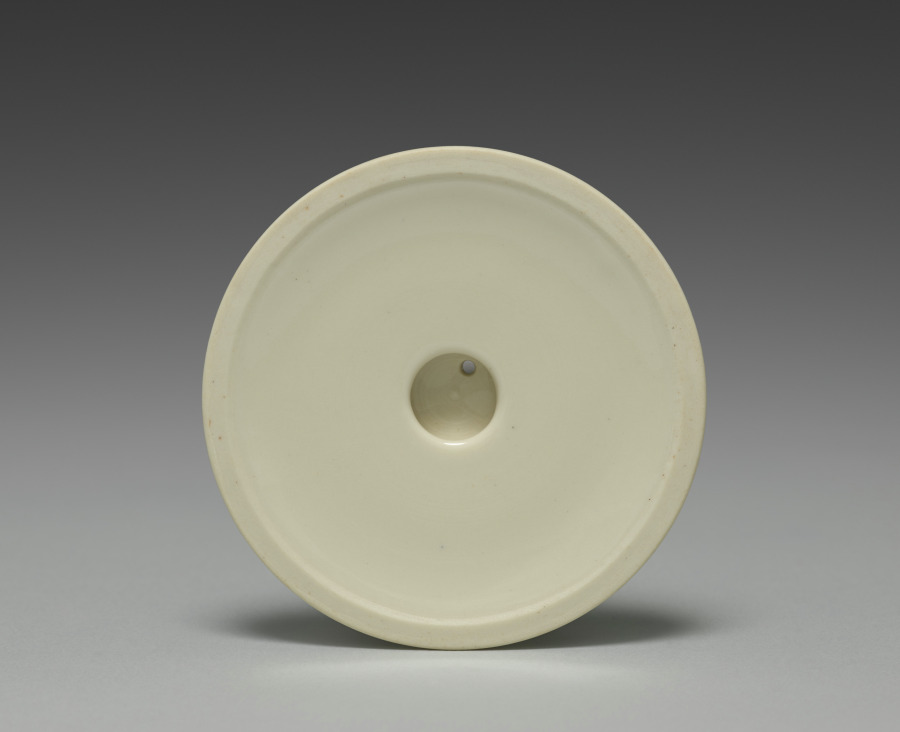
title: Lid for a Hand-held Teapot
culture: Japan, Meiji period (1868–1912)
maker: Seifū Yohei III (Japanese, 1851–1914)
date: 1893–1914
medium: Porcelain with molded and carved design and cream glaze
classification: Ceramic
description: This teapot is of a variety used by advanced sencha practitioners. Called a hōhin, the pot is designed to be held directly by the fingers, with the body touching the upper part of the palm. This shape allows the host to manipulate the pot with a single hand and demonstrate dexterity. Direct contact between the ceramic body and the hand allows the host to closely gauge the temperature of the water within. There are differing grades of sencha, and for the finest one, gyokuro, the water temperature must be carefully regulated to achieve the proper flavor. This vessel is therefore efficacious for preparing this high-quality tea. The hōhin is also extremely portable, so it is well suited for impromptu gatherings. According to its box, this teapot is an example of taihakuji. “Great-white porcelain” was an important early invention Yohei III devised in 1972. It involved the combination of a distinctive translucent, creamy glaze over an ivory-colored clay body.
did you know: This pot’s restrained design includes on the lid’s handle a yin-yang motif, symbolizing the ideal balance between the forces of the universe.